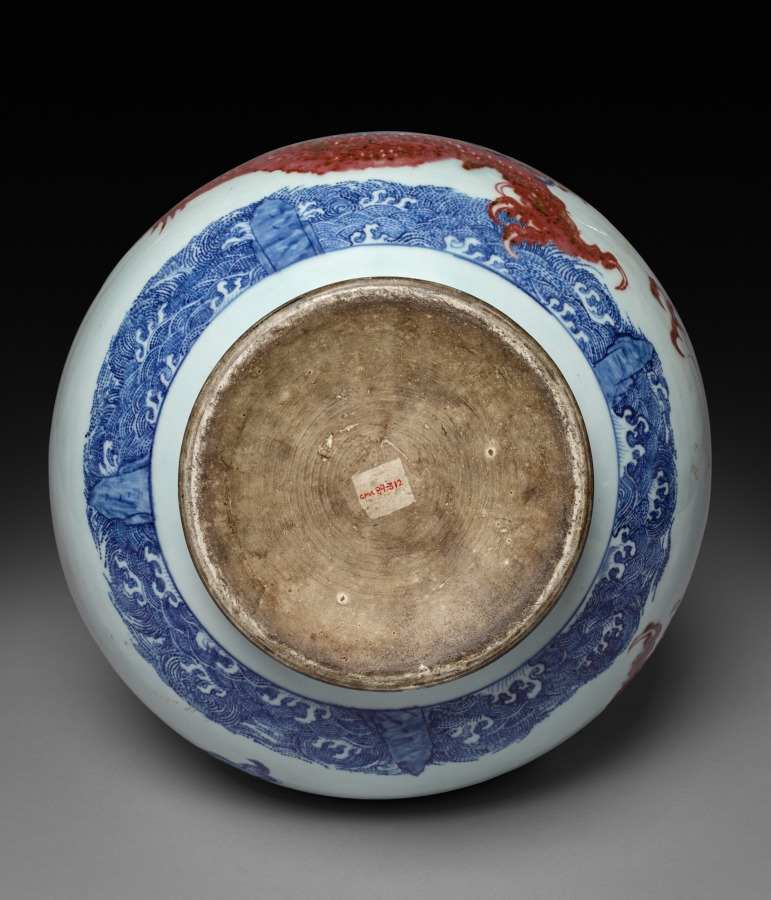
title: Vase with Dragon and Cloud Decoration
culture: China, Qing dynasty (1644-1911), Yongzheng reign (1723-35)–Qianlong reign (1736-95)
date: mid- to late 1700s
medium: porcelain with underglaze blue and red decoration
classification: Ceramic